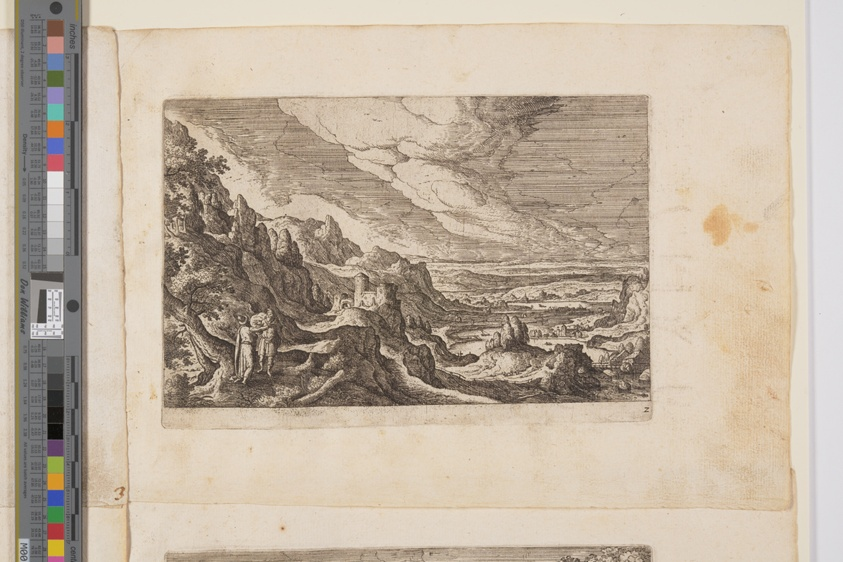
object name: Print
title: Plate 2, from Landscapes with Scenes from the Old and New Testament and Ovid’s Metamorphoses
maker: Hans Bol (Flemish, 1534–1593); published by Philip Galle (Flemish, 1537–1612)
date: 1574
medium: Etching on ivory laid paper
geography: Flanders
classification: print; paper; prints and drawing; etching